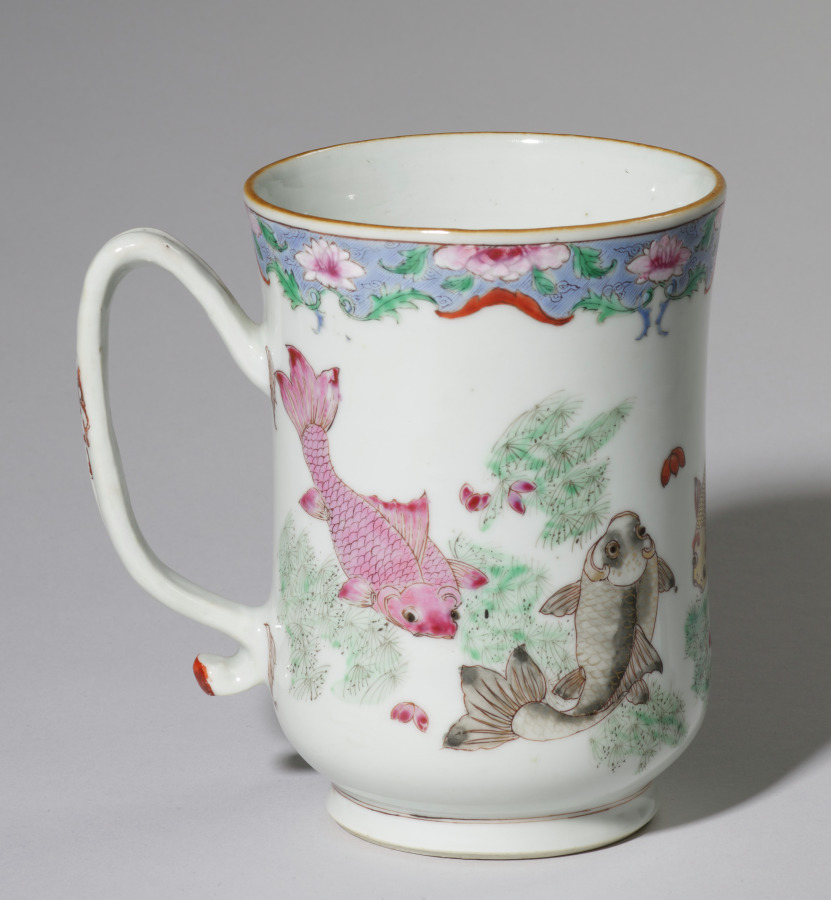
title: Mug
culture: China, Chinese Export -- European Market, 19th century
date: c. 1800–1825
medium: porcelain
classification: Ceramic